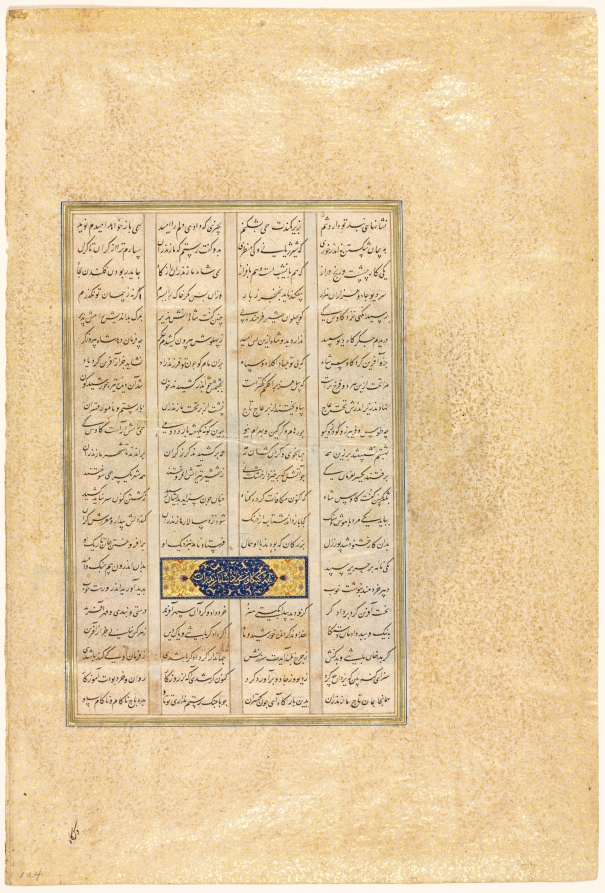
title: Page from a Shah-nama (Book of Kings) of Firdausi (Persian, about 934–1020)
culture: Iran, Tabriz, Safavid period (1501-1722)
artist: attributed to Mir Musavvir (Iranian, c. 1510–1555)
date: 1520–37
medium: Gum tempera, ink, gold, and silver on paper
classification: Manuscript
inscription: Script: Nasta'liq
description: Begun at the end of the reign of Shah Ismail (reigned 1501–24), first king of the Safavid dynasty of Iran, this copy of the Shah-nama (Book of Kings) was completed during the reign of his son Shah Tahmasp. Unparalleled in scope and refinement, the book included 259 paintings by master artists in the royal workshop. Two calligraphers copied the text in an elegant, flowing nasta‘liq script. In 1568, Shah Tahmasp gave this book as a gift to the Ottoman sultan Selim II of Turkey.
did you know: The 50,000 rhyming couplets of the Shahnama tell the story of ancient kings of Iran.